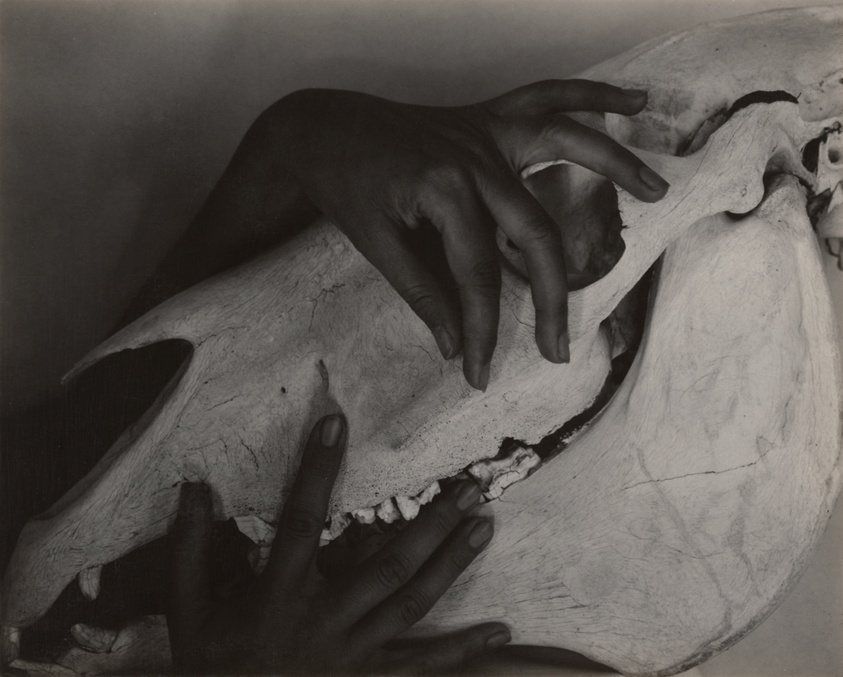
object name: Photograph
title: Georgia O'Keeffe - Hands and Horse Skull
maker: Alfred Stieglitz (American, 1864–1946)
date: 1931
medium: Gelatin silver print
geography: United States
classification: gelatin silver (developing-out-paper) pr; photographic process; photography; photograph